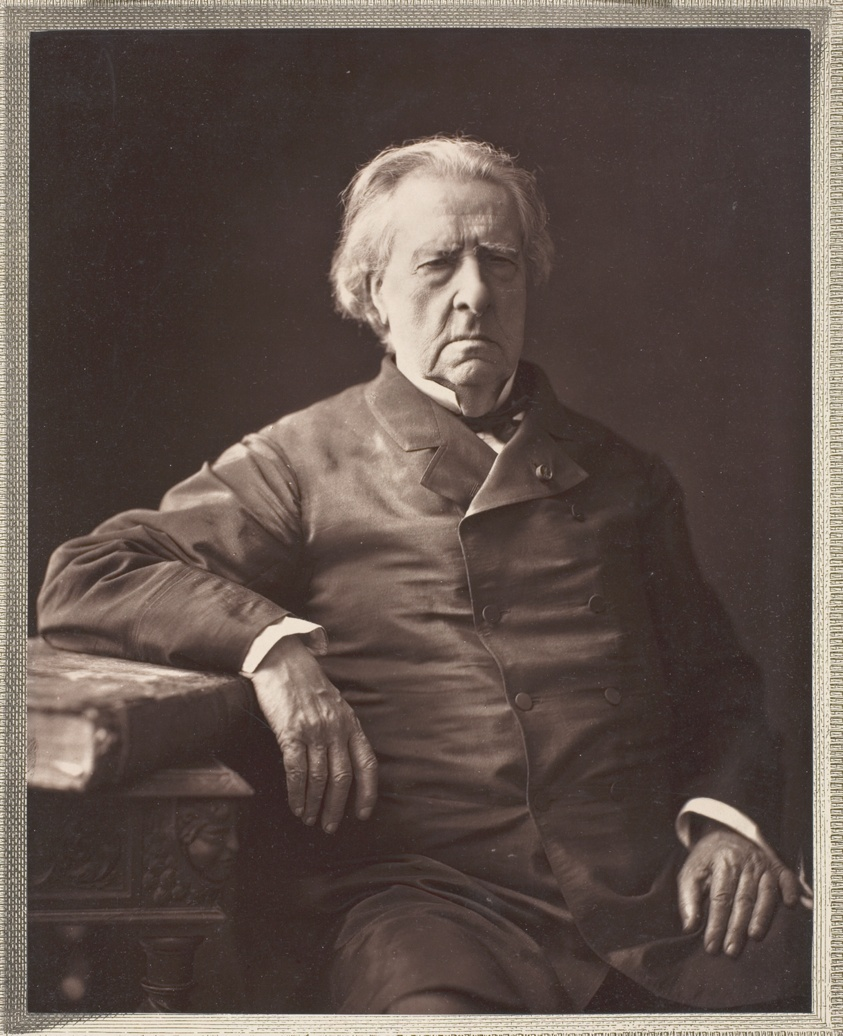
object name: Photograph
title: Baron Isidore Justin Séverin Taylor (Belgian playwright and travel writer, 1789-1878)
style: 19th century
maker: Nadar (Gaspard Félix Tournachon) (French, 1820–1910)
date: 1872/75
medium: Woodburytype, from the periodical “Galerie Contemporaine Littéraire, Artistique” (1877), volume 4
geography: France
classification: woodburytype; photomechanical process; photography; photograph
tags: Collected by Hugh Edwards, Contemporaine Littéraire